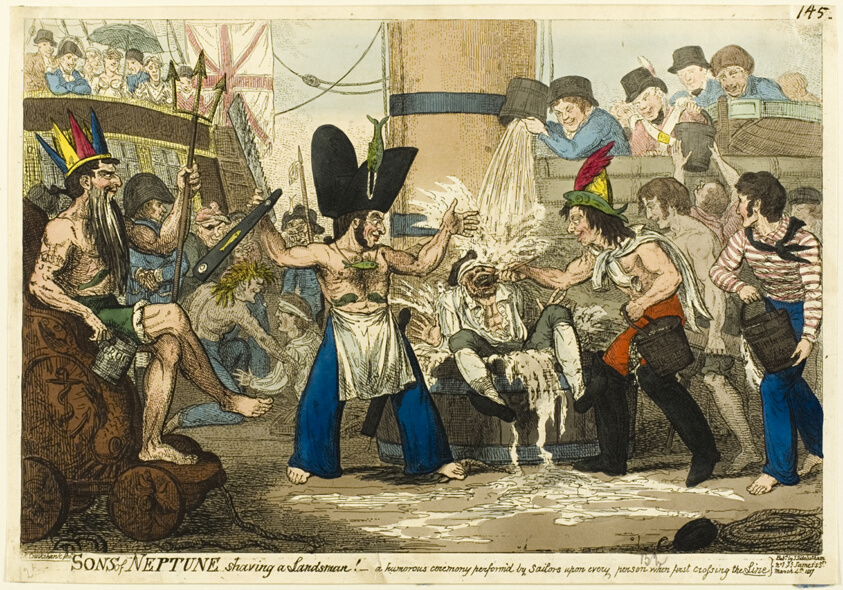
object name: Print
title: Sons of Neptune Shaving a Landsman!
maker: Isaac Robert Cruikshank (English, 1789-1856); published by J. Sidebotham (English, active 1802-1820)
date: published March 4, 1817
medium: Hand-colored etching on paper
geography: England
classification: etching; print; prints and drawing